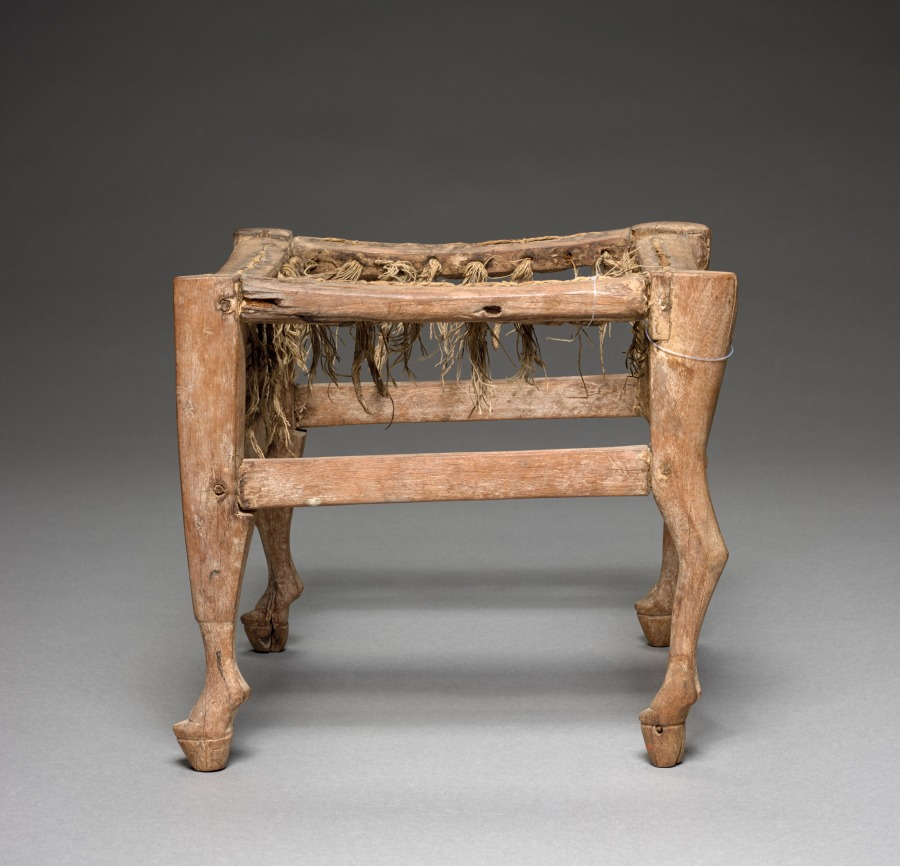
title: Child's Stool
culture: Egypt, New Kingdom (1540–1069 BCE), Dynasty 19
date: 1295–1188 BCE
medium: wood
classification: Funerary Equipment